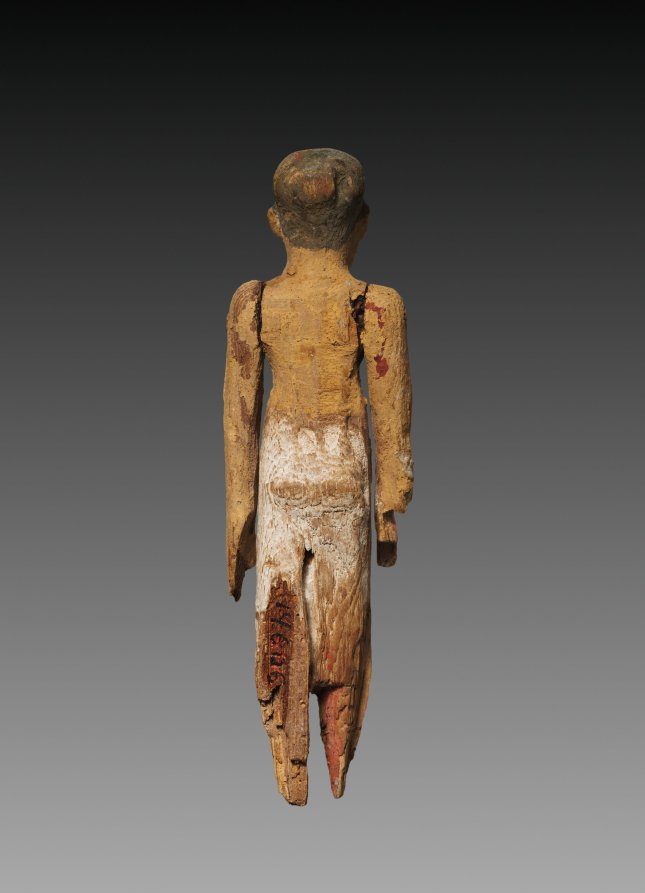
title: Model Figure of a Man, Perhaps a Boat Attendant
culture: Egypt, perhaps Meir, Middle Kingdom (2040–1648 BCE)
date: 2040–1648 BCE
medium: painted sycamore fig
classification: Funerary Equipment